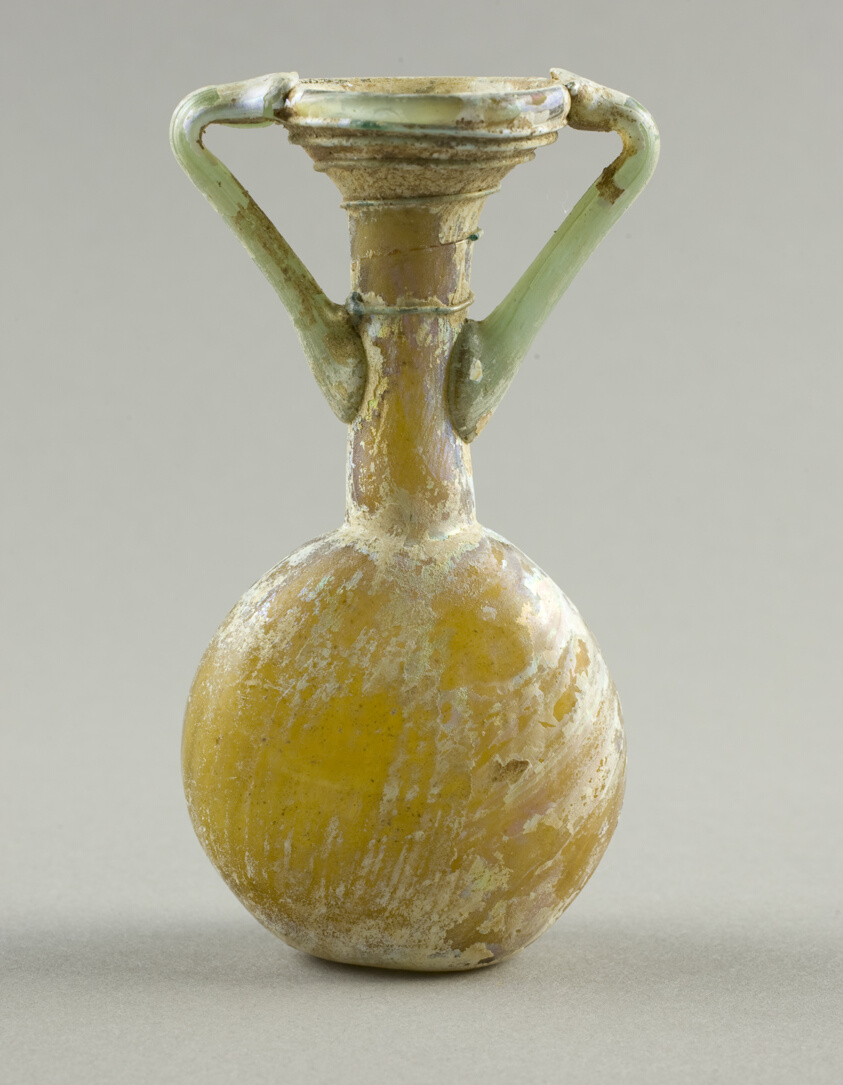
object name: Vessel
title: Flask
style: syrian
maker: Roman; Levant or Syria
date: 3rd century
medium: Glass, blown technique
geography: Syria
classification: glass; vessel; ancient art